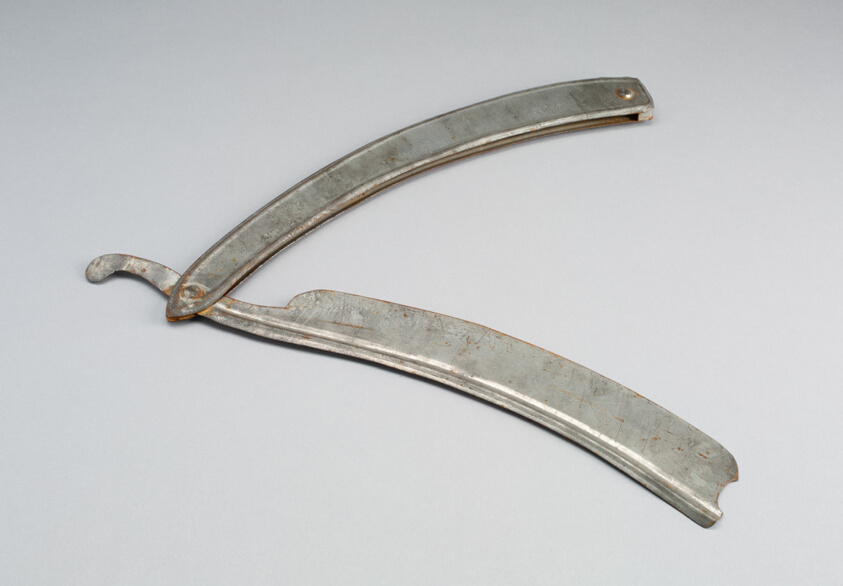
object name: Decorative Arts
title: Razor (Anniversary Tin)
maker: Artist unknown (American, 19th century)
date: 1850–1900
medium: Tin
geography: United States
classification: metalwork; american decorative arts; american arts; decorative arts